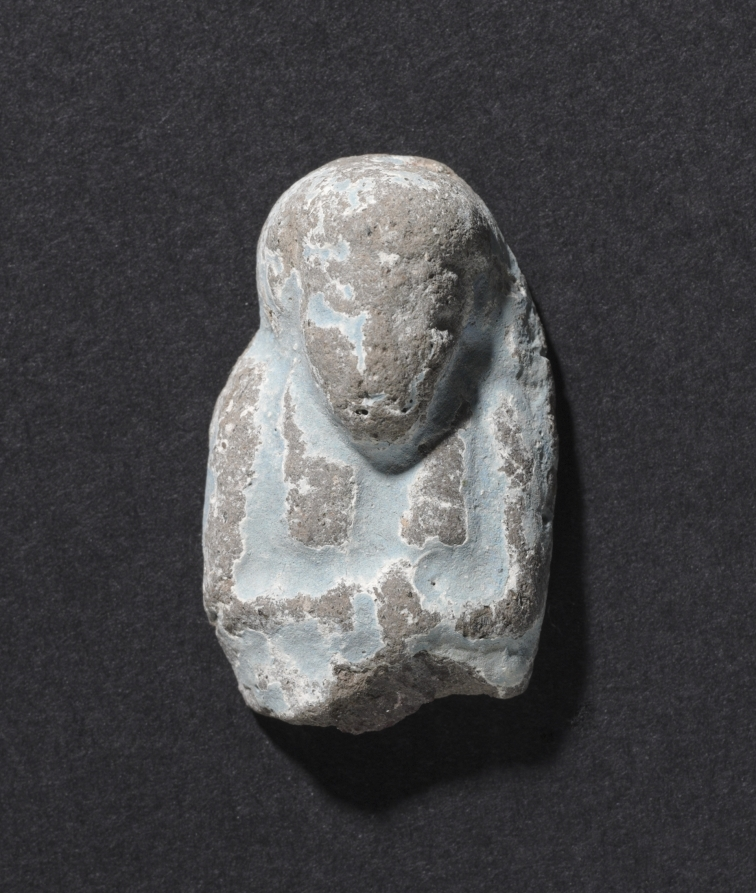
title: Shawabty of Ditamenpaankh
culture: Egypt, Late period (715–332 BCE), Dynasty 25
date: 715–656 BCE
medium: terracotta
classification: Funerary Equipment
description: High demand for shawabtys in the Late Period, a time when as many as 400 or more shawabtys were placed in the tomb with the deceased, gave rise to a specialized container for storing them: the shawabty box. This example is inscribed for the lady of the house, Ditamenpaankh, and was probably one of a pair originally made for her. The single-masted boat on the box's lid is perhaps an allusion to the pilgrimage of the deceased to the holy city of Abydos, the cult city of Osiris, king of the dead. The shawabtys inside are crude, mass-produced examples cast in an open mold. Made of terracotta, their blue paint imitates more costly shawabtys made of faience. As for the shawabty spell, it has been removed from its traditional location on the shawabty's front and relocated onto the sides of box, where it needed only to be written once, thus expediting production.